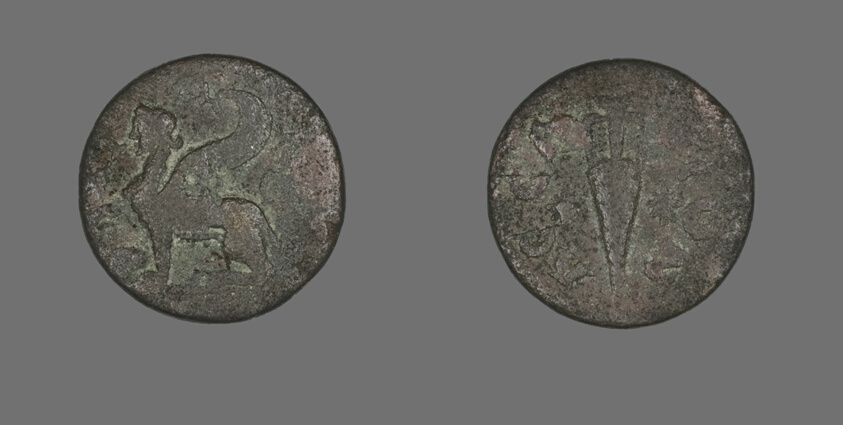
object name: Coin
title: Coin Depicting a Sphinx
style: roman (ancient, style or period)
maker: Roman; Chios, Ionia (now Turkey)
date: 138-217 (?)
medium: Bronze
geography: Roman Empire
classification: coin; ancient art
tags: sphinxes, vessels, mythical